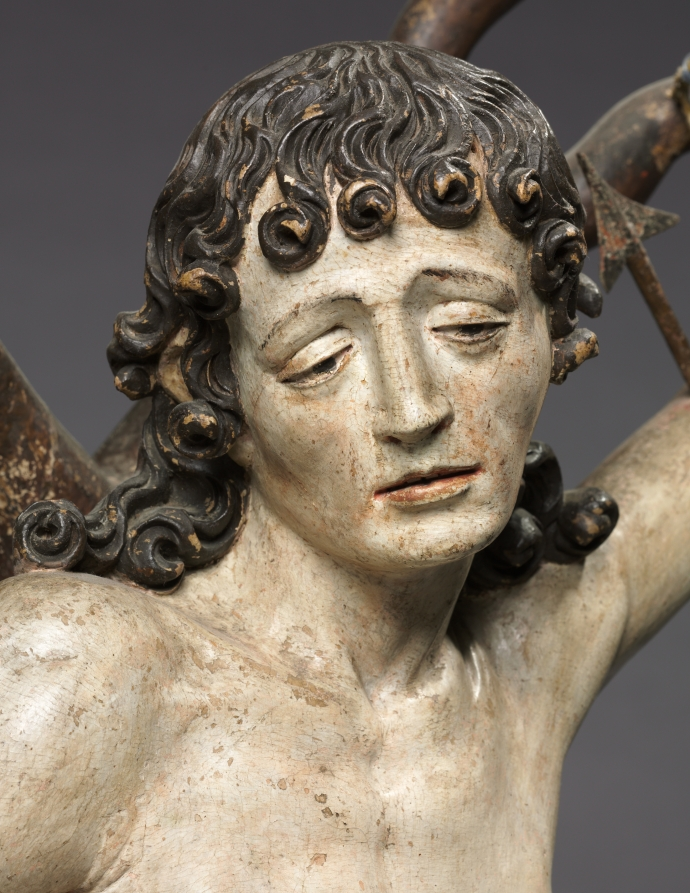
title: Saint Sebastian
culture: Germany, early 17th century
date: c. 1600–1620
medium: painted and gilded wood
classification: Sculpture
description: An early Christian saint and martyr, Sebastian was condemned to death by the Roman emperor Diocletian. Bound to a tree and shot with arrows, he survived—only later to be martyred by beating. This figure embodies the blend of stylistic influences that characterized German sculpture in the early 1600s. The graceful pose and anatomical naturalism of the legs indicate the influence of Italian Mannerism, while the crisp, stylized patterns of Sebastian’s hair and loincloth recall German Gothic works from the 1400s. The tree to which Sebastian is bound is an actual branch, shaped and refined to its present appearance.